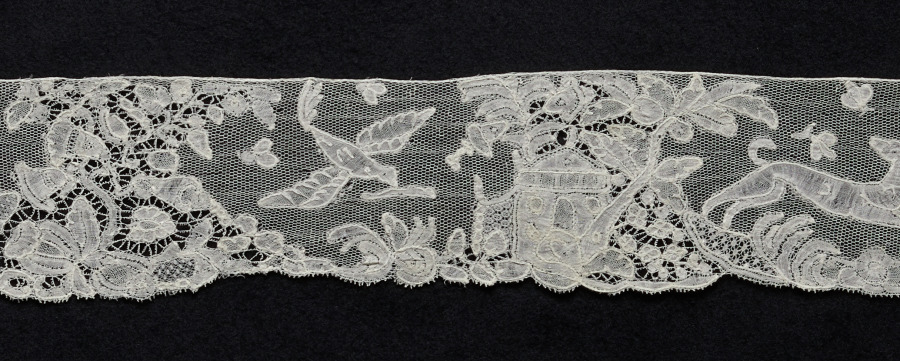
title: Lace Edging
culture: Belgium, Brussels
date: 1700s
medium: Linen: bobbin lace (Point d'Angleterre)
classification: Lace